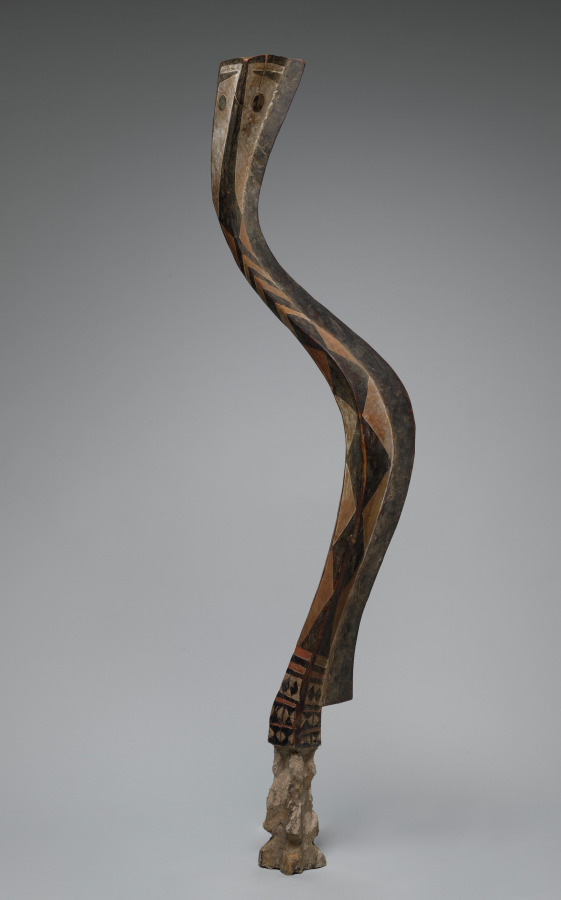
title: Serpent Headdress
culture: Africa, West Africa, Guinea, possibly Baga-style maker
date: late 1800s–early 1900s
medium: Wood (Nauclea pobeguinii) and paint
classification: Mask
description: Traditionally, Baga society was ruled by village councils of elders who derived their power from their direct contact with spirit entities through lifelong initiation rituals and the accumulation of secret knowledge. Two different religious orders controlled initiations, providing the context for much Baga art. One was identified as female, the other as male, though only men belonged to both groups. Initiations in each order followed three stages, culminating in the revelation of the highest spirit being. This type of Baga headdress embodied the serpent spirit Ninkinanka, honored for giving rain, bestowing riches, and bringing forth children. The serpent figure would be placed on top of a conical framework of palm branches carried on a male dancer’s head. It appeared at the end of the first level of the initiation for boys and girls or just before the circumcision at the beginning of the boys’ initiation.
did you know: In the context of boys' initiations, the serpent headdress was sometimes identified as the rainbow, which the Baga and their neighbors associate with beginnings and endings, life and death, and the continuation of lineages.